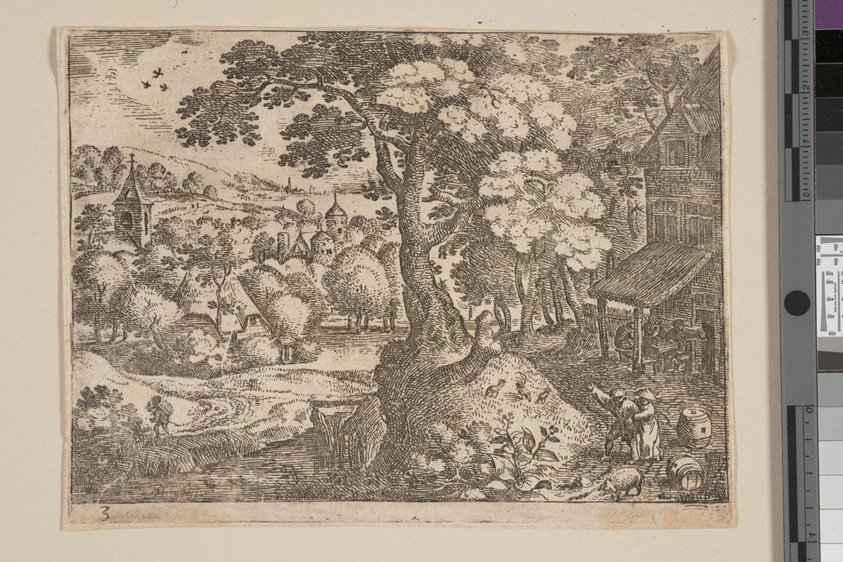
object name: Print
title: Tavern to Right of a Path, from Landscapes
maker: Jacob Savery; Flemish, 1566–1603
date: c. 1595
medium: Etching on ivory laid paper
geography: Flanders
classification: etching; paper; print; prints and drawing